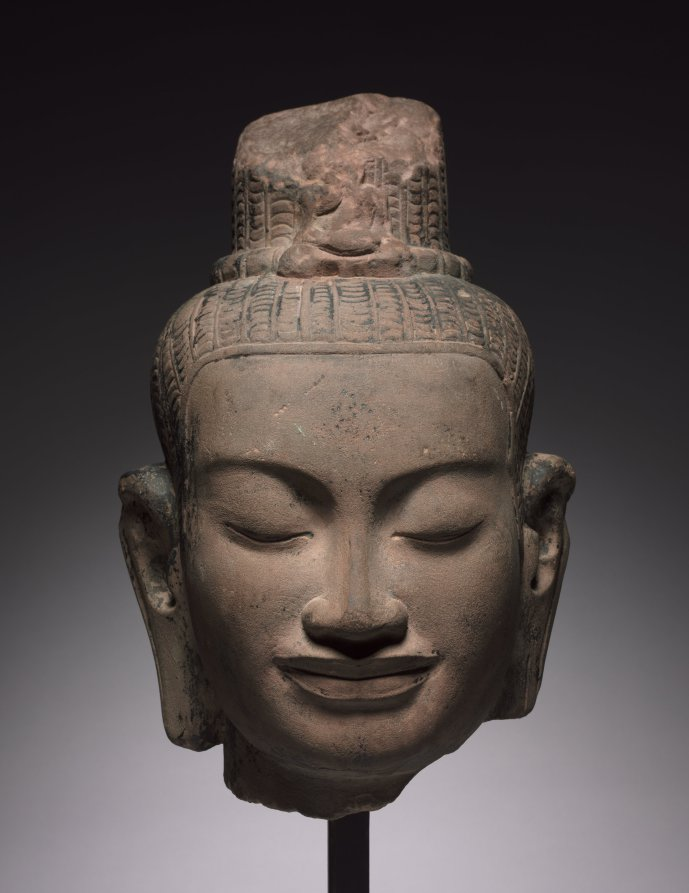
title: Head of Lokeshvara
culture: Cambodia, reign of Jayavarman 7th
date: late 1100s–early 1200s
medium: Sandstone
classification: Sculpture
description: At Banteay Chhmar, none of the three-dimensional stone sculptures that were installed in the temple buildings remain standing. Only fragments of five stone sculptures of Lokeshvara have been found, and more may be recovered with future clearing of the site. This head is stylistically similar to the ones from Banteay Chhmar and is of the type made throughout Cambodia during the reign of Jayavarman VII. Lokeshvara was the form under which his father was apotheosized and venerated. Traces of black lacquer on the stone’s surface remain from when the head was probably refashioned into another image, likely reused for other Buddhist groups who became influential in the post-Angkorian period whose main focus was the historical Buddha rather than Lokeshvara. The lacquer, however, preserved the stone carving beneath, and it shows how the face of the bas-relief of the ten-armed Lokeshvara from Banteay Chhmar would have looked, had it not become eroded by exposure to the elements. The downcast eyes have a compassionate and meditative gaze, while the mouth smiles gently in the confidence of the power of his mercy. The small figure of a seated Buddha in front of the topknot of hair confirms his identity as Lokeshvara.